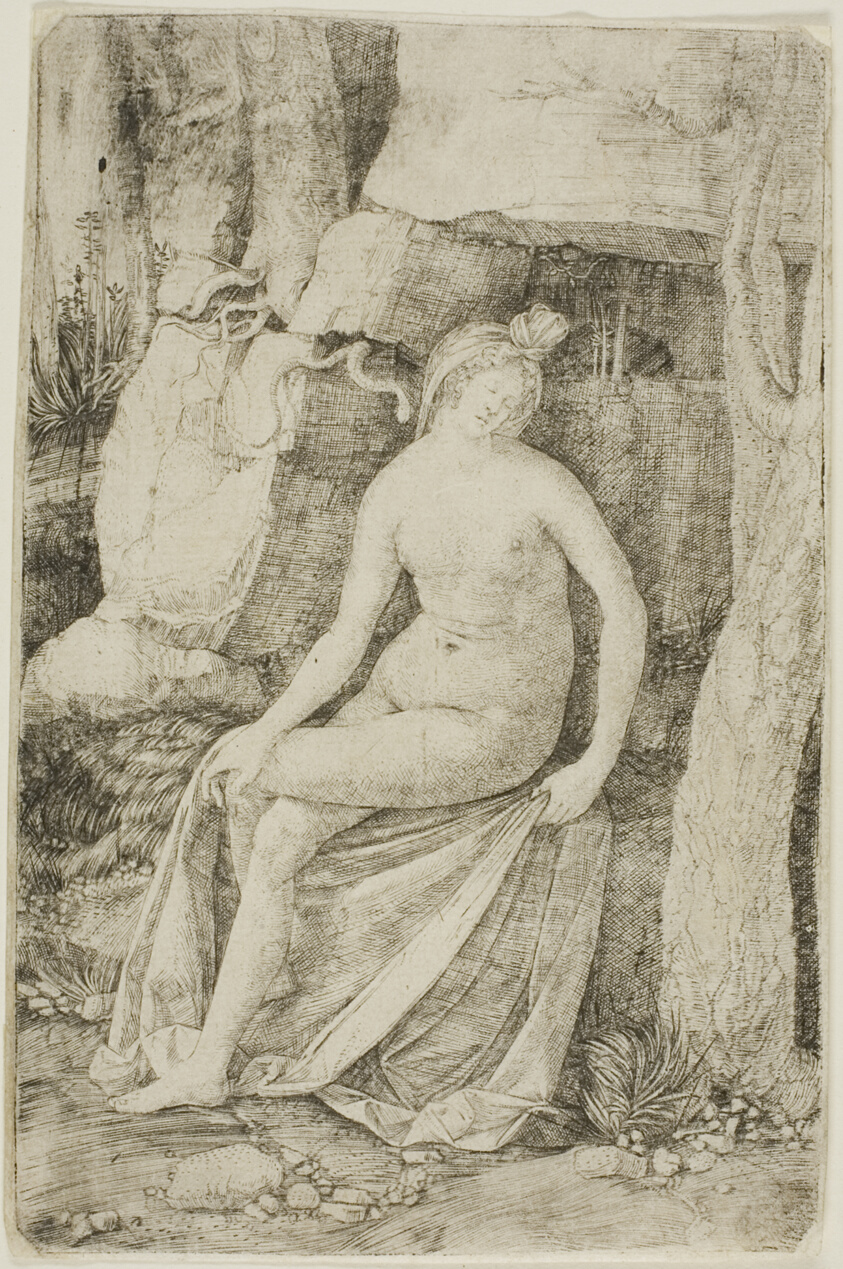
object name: Print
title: Cleopatra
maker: Jacopo de' Barbari (Italian, 1460/70-before July 1516)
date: 1509/15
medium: Engraving on cream laid paper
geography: Italy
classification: print; prints and drawing